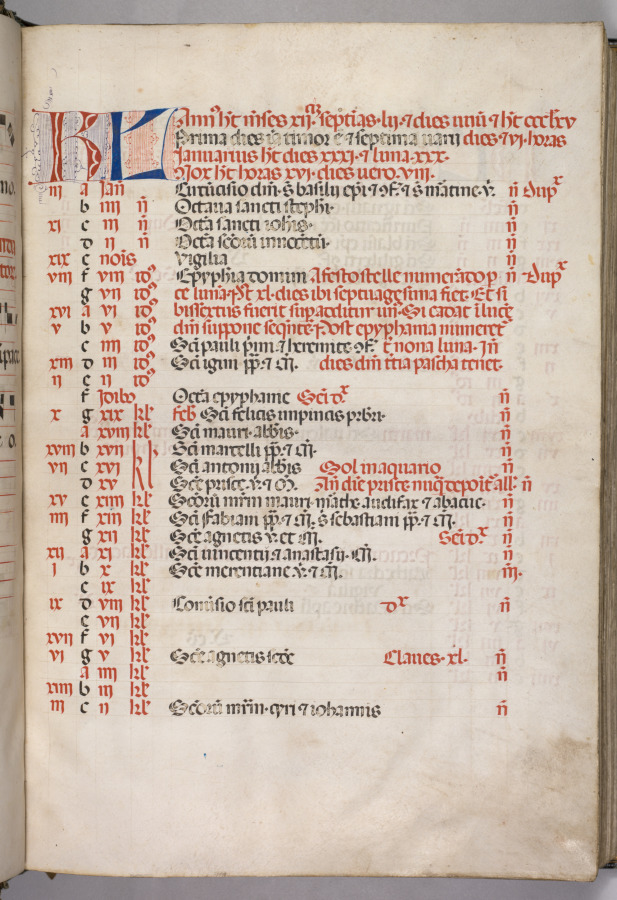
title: Missale: Fol. 3r: January Calendar Page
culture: Italy, Perugia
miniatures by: Bartolommeo Caporali (Italian, c. 1420–1503)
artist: assisted by Giapeco Caporali (Italian, d. 1478)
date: 1469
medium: ink, tempera and burnished gold on vellum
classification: Bound Volume